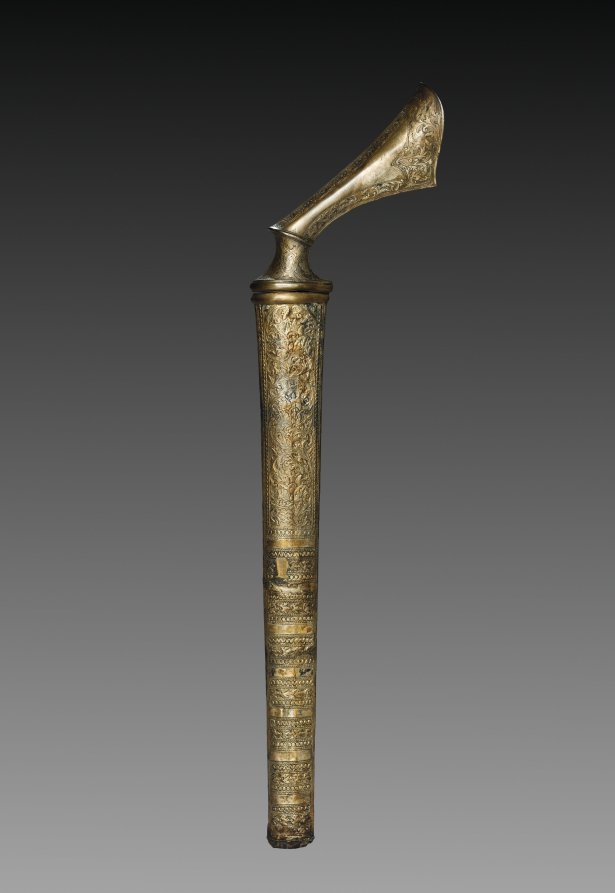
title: Knife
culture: Sumatra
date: 1500s–1800s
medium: Blade: steel; handle: copper alloy with silver gilt; scabbard: copper alloy, silver gilt, wood, and textile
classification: Arms and Armor